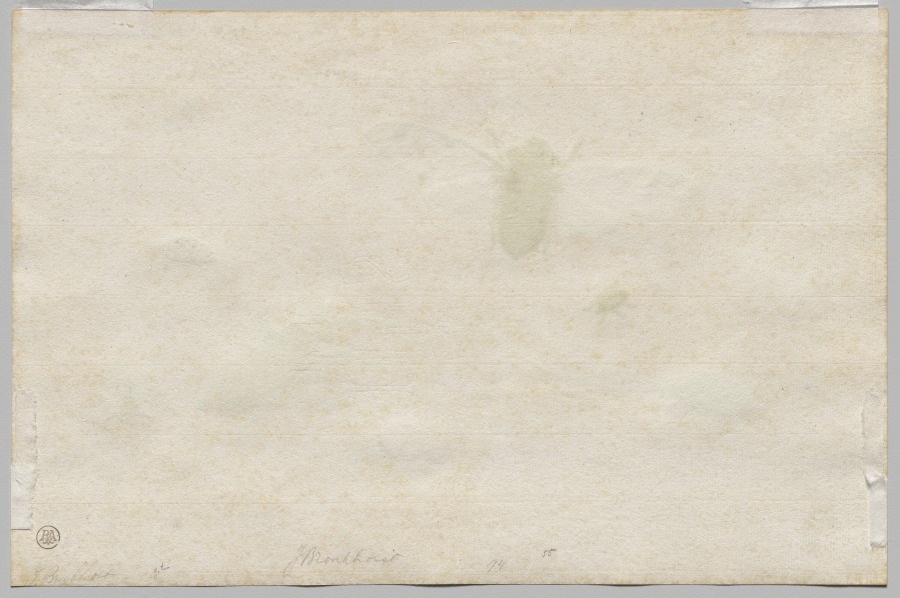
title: Studies of Insects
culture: Netherlands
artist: Johannes Bronckhorst (Netherlands, 1648–1727)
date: c. 1665–1727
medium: watercolor, opaque watercolor, and gum arabic with brown ink framing lines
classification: Drawing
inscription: In graphite on verso: J. Bronckhorst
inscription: In graphite on verso: J. Bronckhorst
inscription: In graphite on verso: 94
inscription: In graphite on verso: 55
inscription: In ink on verso: Collector's stamp, BA or RA (circled)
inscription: In ink on recto: J.B. fec:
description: In the 17th century, an interest in flora and fauna, both local and exotic, in the Netherlands led to vast collections of insects, plants, and animals among academics and amateurs. Artists such as Johannes Bronckhorst became specialists at recording these collections in paint, to be kept in portfolios and shown to visitors. The grouping of insects on this sheet suggest that Bronckhorst had access to a varied collection, and include a cicada, a cereal-leaf beetle, a harlequin ladybird, a spiny orb-weaver spider, two Asian longhorn beetles, a red rhinoceros beetle, a rosemary beetle, and a stick insect. With great attention to detail, Bronckhorst may have selected this particular assembly with no other intent than to create a balanced and colorful composition.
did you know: With an extremely fine brush, the artist used a magnifying glass to draw the minute details of these insects, using watercolor and opaque watercolor, and gum arabic to create sheen.